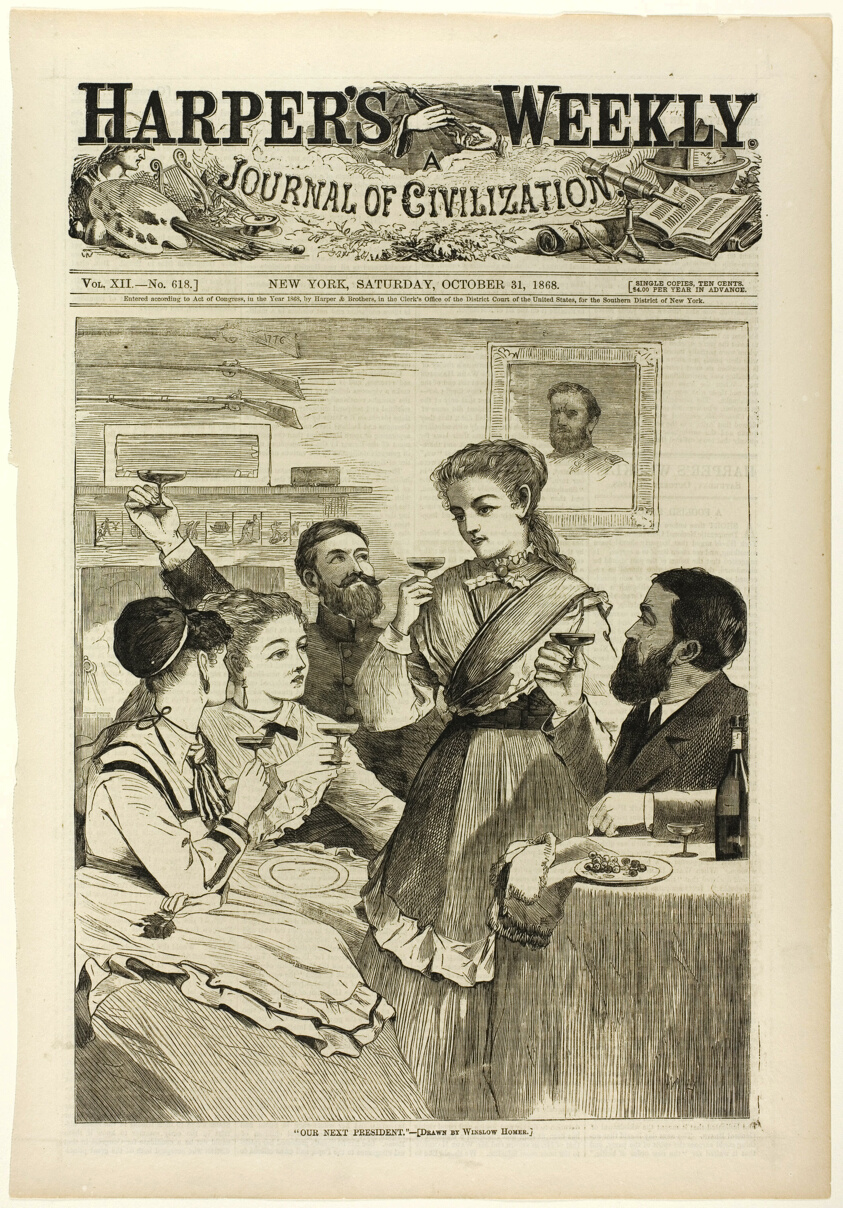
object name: Print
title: Our Next President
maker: Winslow Homer (American, 1836-1910); published by Harper's Weekly (American, 1857-1916)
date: published October 31, 1868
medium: Wood engraving on paper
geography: United States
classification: wood engraving; print; prints and drawing